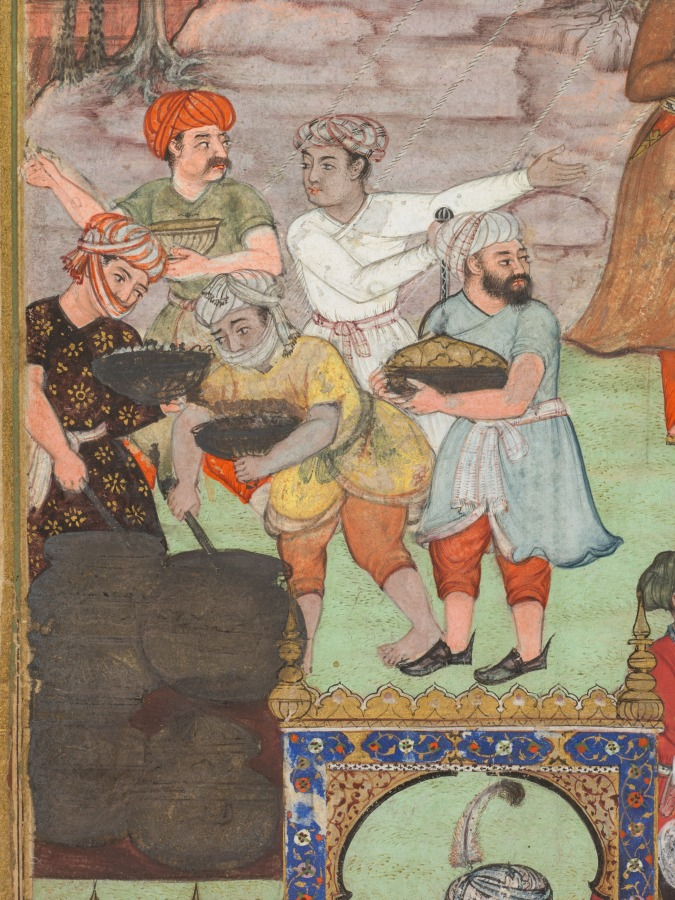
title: A feast for Babur hosted by his half-brother Jahangir Mirza in Ghazni in May 1505, from a Babur-nama (Memoirs of Babur)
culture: India, Mughal, 16th century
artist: Basavana (Indian, active c. 1560–1600)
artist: and Madhav Khurd (Indian, active late 1500s)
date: c. 1589; outer margins added c. mid-1900s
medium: Gum tempera and gold on paper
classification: Painting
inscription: verso: Persian text, in nasta‘liq script: . . . presented many gifts. In that year most of the rivers had become very swollen, to the extent that the Dih-i Ya‘qub River could not be forded. I brought the boat I had made at the lake and floated it in the waters of Dih-i Ya‘qub opposite Kamri and all the people crossed by boat. For this reason we went through the Sajavand pass and straight through crossing the river at Kamri by boat. We arrived at Kabul in the month of Dh’ul-Hijja [May 1505]. A few days earlier, Sayyid Yusuf Beyg had died of colic. At Kush Gunbad, Nasir Mirza had requested leave and remained behind to get provisions for his retinue from his own domain, saying he would follow in two or three days. Once he had left us he sent his entire army to the Nur valley on account of a minor act of disobedience by the people of the Nur valley. [Given] its rice fields and the location of its citadel on the peak of the mountain as . . .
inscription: recto: Persian inscription in bottom margin, in nasta‘liq script: the work of Basavana / [ . . . ] / Madhav Khurd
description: Twenty-one years before his conquest of Delhi, Babur took control of territories in Afghanistan, including the cities of Kabul and Ghazni. His half-brother, who controlled the region around Ghazni, ordered that a party be thrown in honor of Babur’s arrival from the north. Drinking parties and feasts in lavish movable tent settings, where gifts were exchanged, alliances forged, and relationships cemented, were as important to the building of the empire as the battles.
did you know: A manager directs servers to bring spoons and lay out the buffet table.